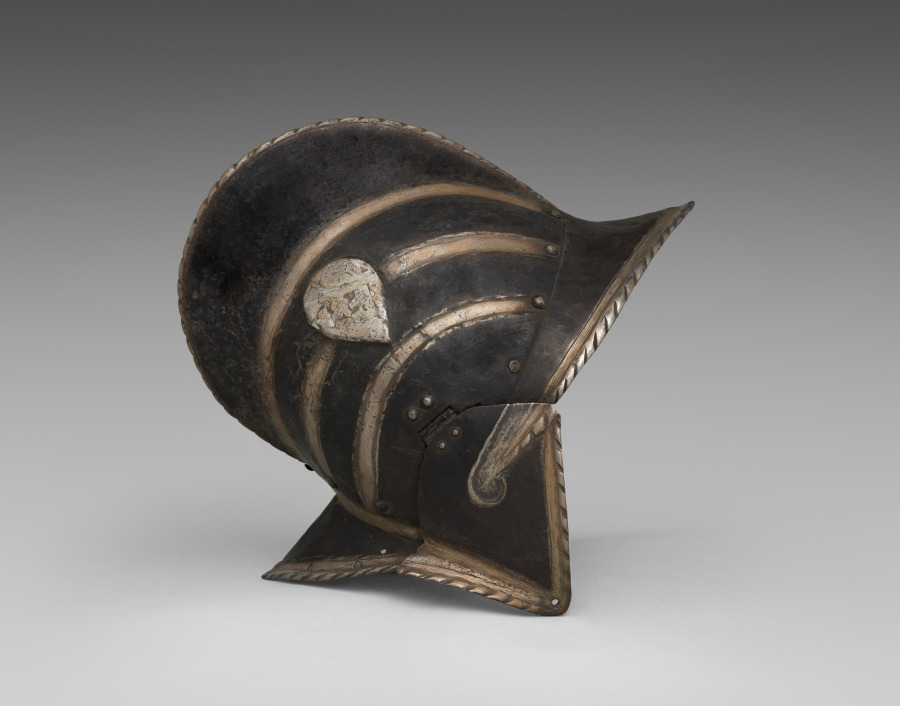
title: Black and White Burgonet (of the Civic Guard of Bologna)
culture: Italy, late 16th Century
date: c. 1580–1600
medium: steel with black paint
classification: Arms and Armor